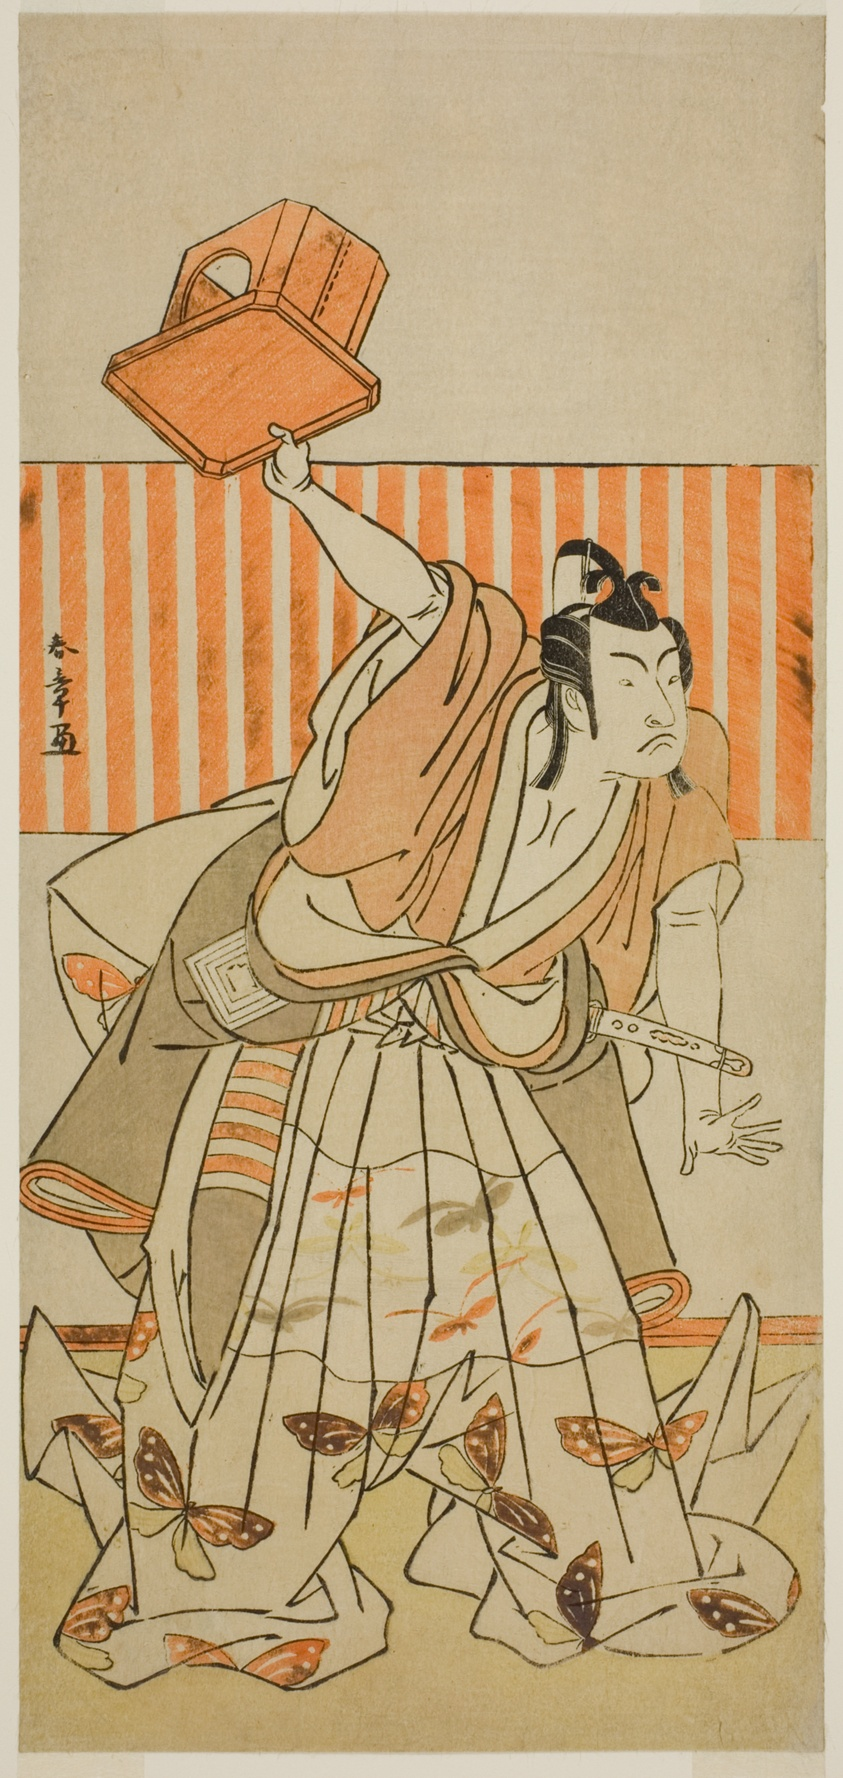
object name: Print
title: The Actor Ichikawa Monnosuke II as Ageha no Chokichi Disguised as Soga no Goro Tokimune in the Play Kaido Ichi Yawaragi Soga, Performed at the Nakamura Theater in the Third Month, 1778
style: Japanese (culture or style)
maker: Katsukawa Shunsho 勝川 春章; Japanese, 1726-1792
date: c. 1778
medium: Color woodblock print; hosoban; from a multisheet composition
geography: Japan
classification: woodblock print; print; asian art